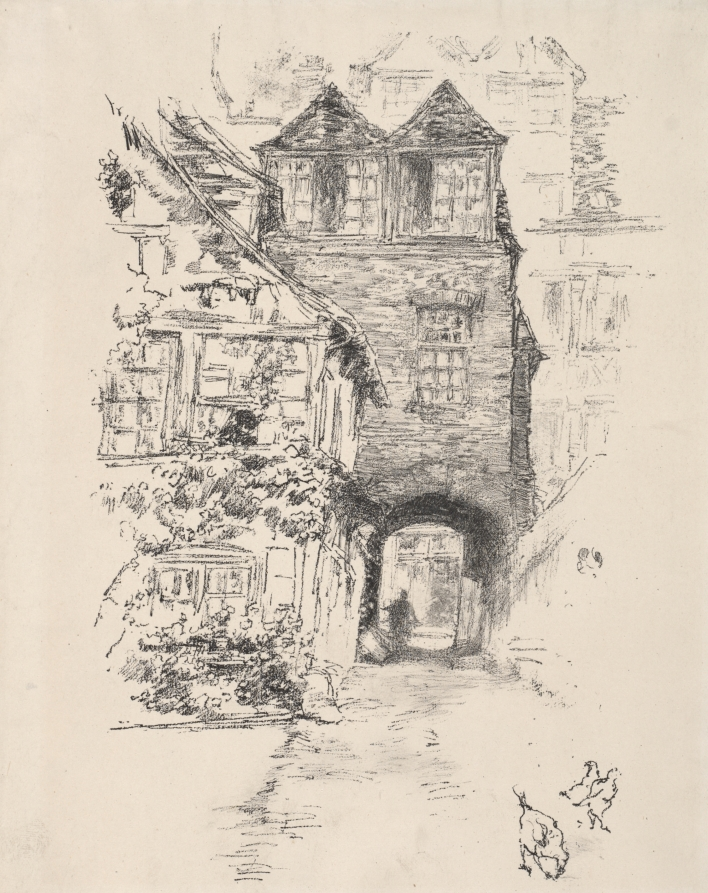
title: The Priest's House, Rouen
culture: America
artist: James McNeill Whistler (American, 1834–1903)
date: 1894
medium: lithograph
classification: Print